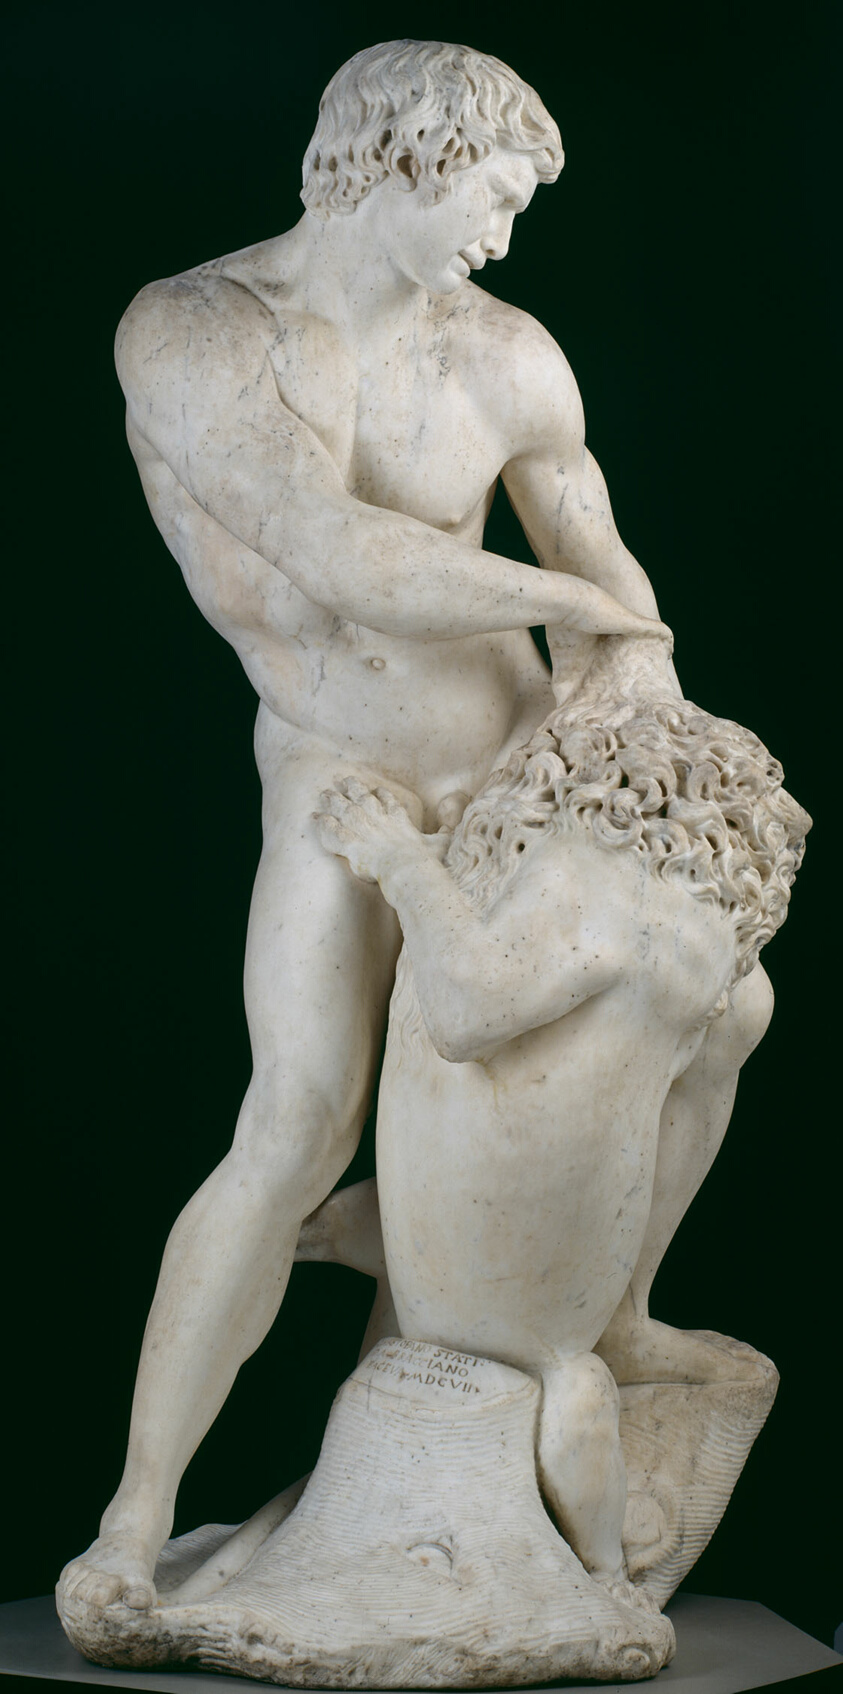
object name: Sculpture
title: Samson and the Lion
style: 17th Century, Baroque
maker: Cristoforo Stati (Italian, 1556–1619)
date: 1604–7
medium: Marble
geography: Italy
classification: large scale; sculpture; Italian; marble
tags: religious, Old Testament, religious scenes, nudes, man, figure, biblical, animals, lions, religious figures